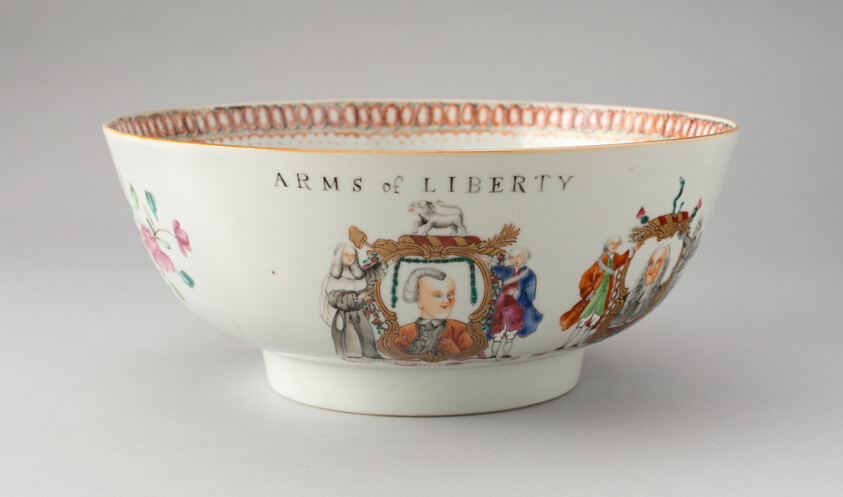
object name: Ceramics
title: Punch Bowl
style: chinese export, 18th Century, asian, Chinese (culture or style), East Asian, qianlong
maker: China, Qianlong reign; Chinese, made for the American market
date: c. 1769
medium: Hard-paste porcelain, glaze, with enamels in colors, and gilding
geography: China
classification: punch bowl; tableware; American market; chinese export porcelain; art of the americas; porcelain; ceramics; decorative arts; pottery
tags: cartouches, Free speech, American colonists, George III, devil/satan/lucifer/beezelbub/mephistopheles, Englishmen, Justice, liberty, lions, men, portraits, snake, thistles, dining, drinking